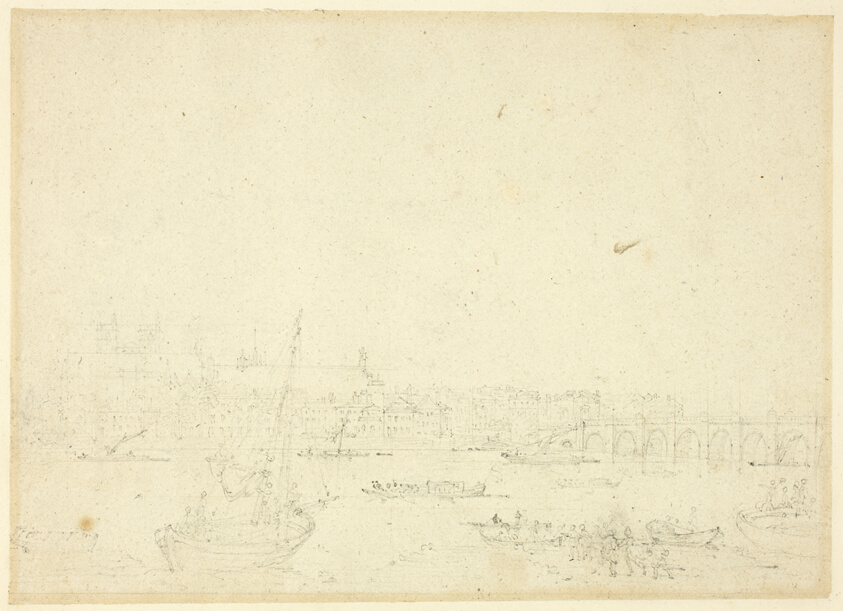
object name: Drawing and Watercolor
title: Study for View of Westminster Hall and Bridge, from Microcosm of London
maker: Augustus Charles Pugin (English, born France, 1762-1832); Thomas Rowlandson (English, 1756-1827)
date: c. 1810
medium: Graphite on buff wove paper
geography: England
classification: graphite; drawings (visual works); prints and drawing